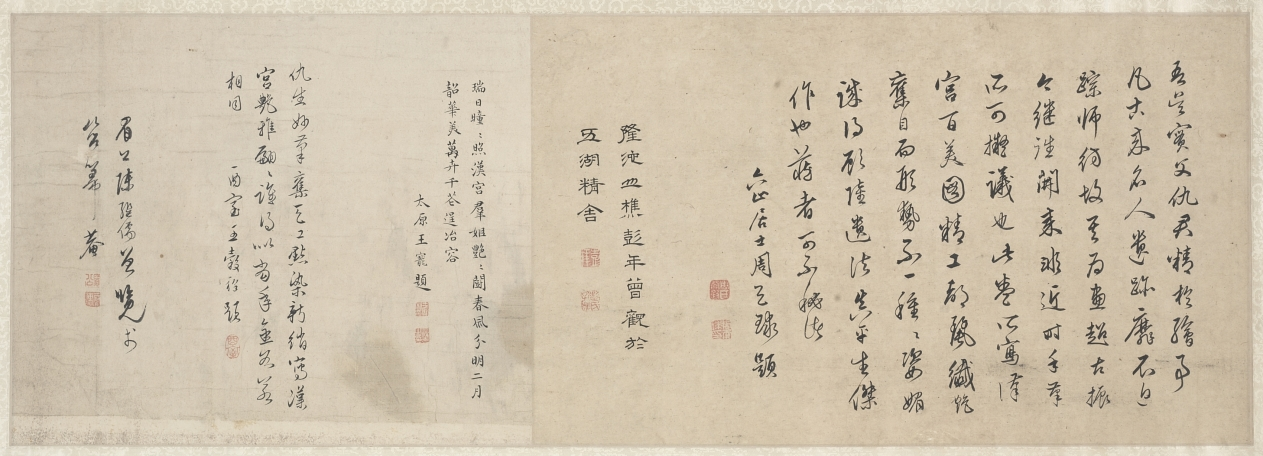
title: Palace Ladies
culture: China, Qing dynasty (1644-1911)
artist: copy after Qiu Ying (Chinese, 1494–1552)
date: 1644–1911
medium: handscroll, ink and color on silk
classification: Painting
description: This handscroll illustrates the pursuits of court ladies in a palace precinct on a spring day. Women, young girls, and their maids amuse themselves by sitting on a swing, playing games, watering and admiring peonies, performing music together, playing the qin (zither), feeding a parrot on the balustrade and fish in the water, or catching butterflies. The life of elite women was mostly restricted to the so-called inner quarters, meaning the garden and inner courts of the house. This painting idealizes the world of young palace girls that in fact was often filled with boredom and waiting for a lover.